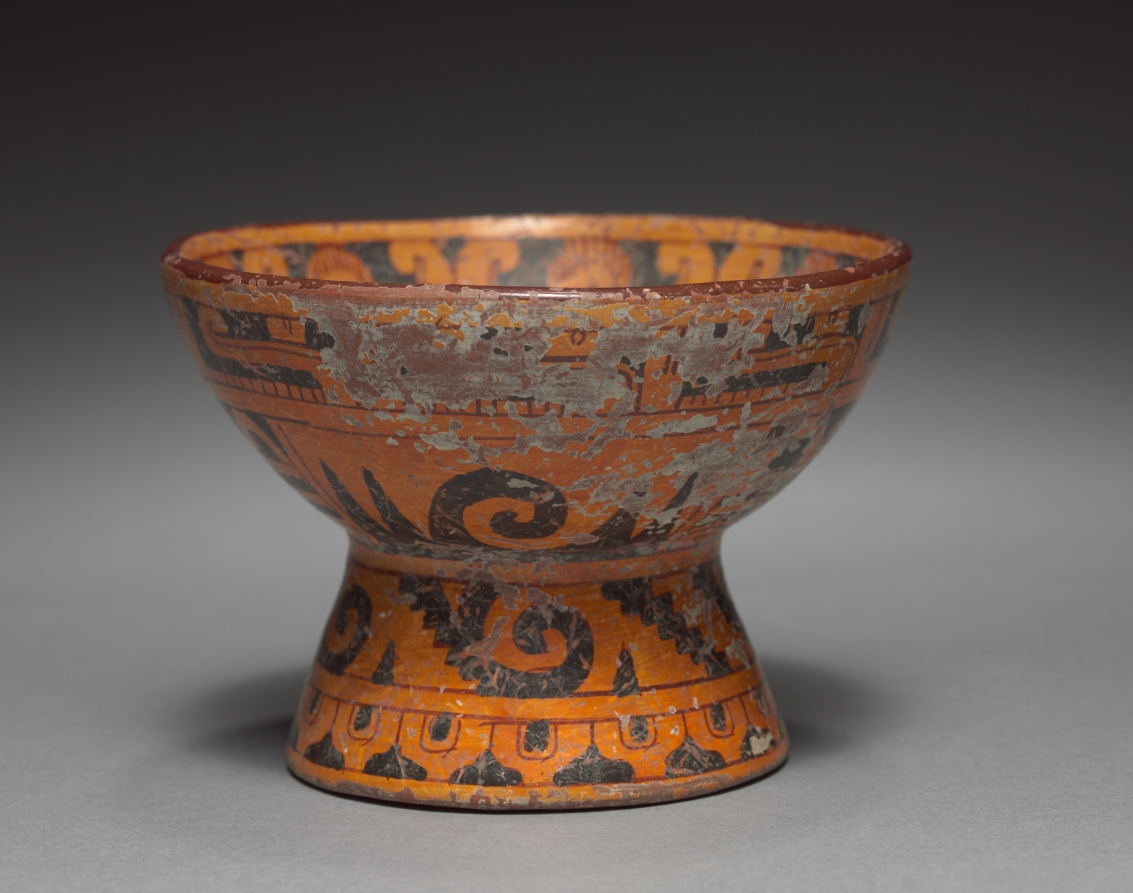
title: Bowl with Rattle Base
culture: Mexico, Cholula?, Mixteca-Puebla Style, 10th-16th century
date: c. 900–1519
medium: earthenware with colored slips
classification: Ceramic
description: The nobility may have used these goblets for a chocolate beverage or for pulque, made from the fermented sap of the maguey cactus. Both are painted with the precision and brilliant colors for which the Mixteca-Puebla style is renowned, and they carry some of the same motifs, such as the band of stylized animal heads at the top. The smaller bowl has a rattle base.